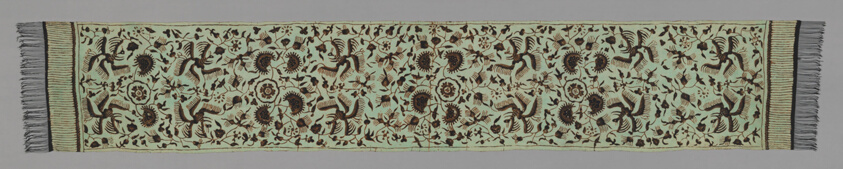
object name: Textile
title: Panel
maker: Indonesia or Greek Islands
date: 19th century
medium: Linen, plain weave; embroidered with cotton in cross stitches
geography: Greece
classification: textile; costume; weaving; needlework (visual works)